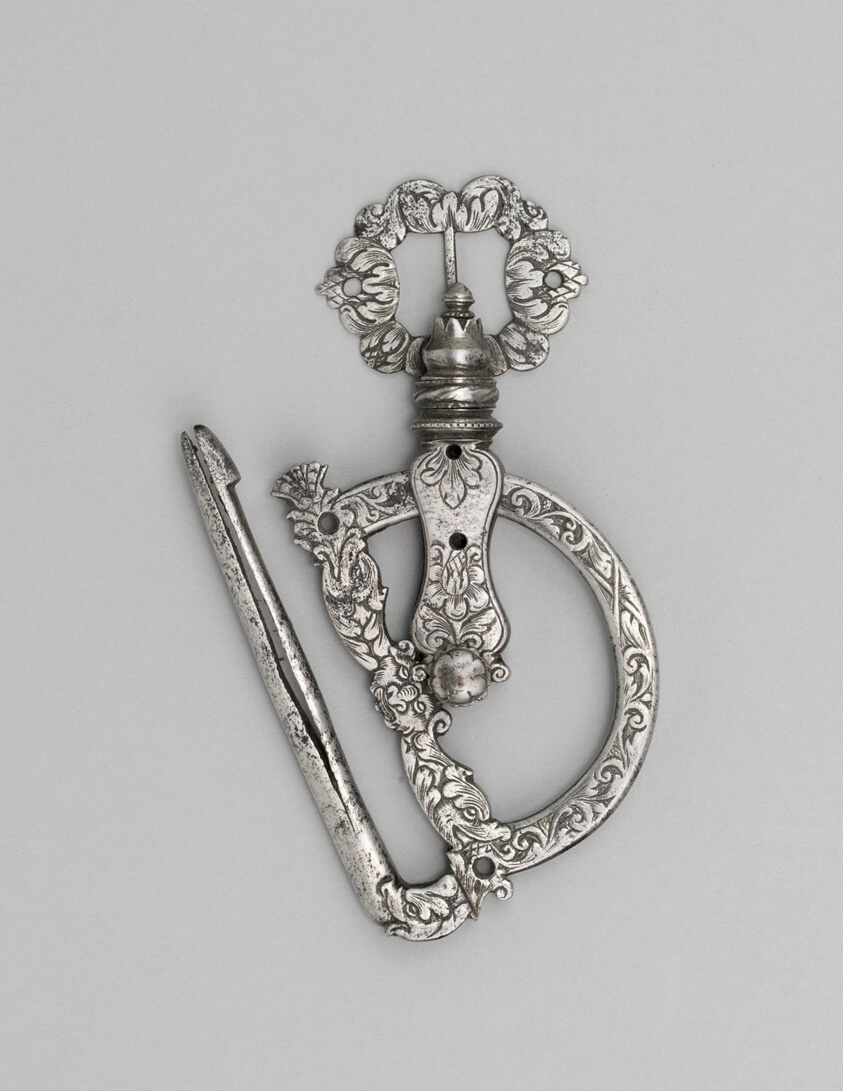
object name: Arms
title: Spring Tackle Attachment for Rapier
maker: Italian or Spanish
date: second half of 17th century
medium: Iron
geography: Italy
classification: edged weapon-sword; arms; arms and armor